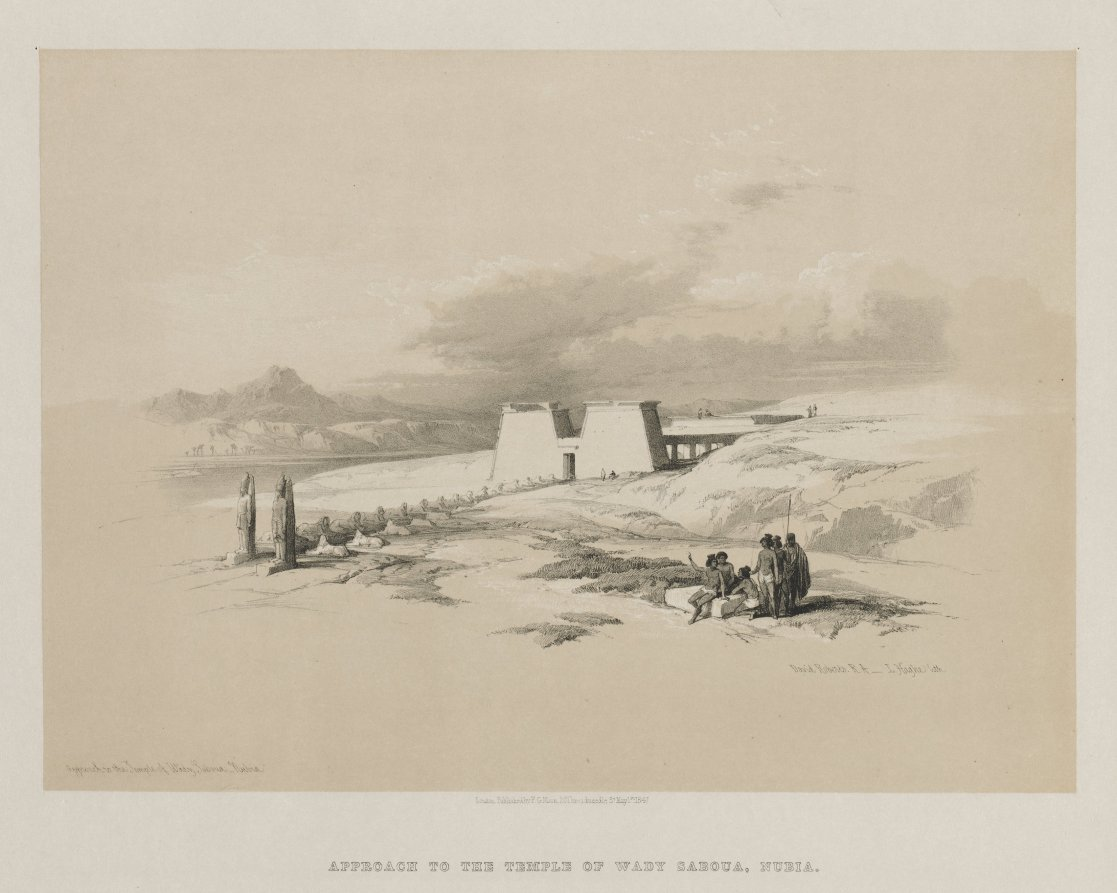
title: Egypt and Nubia, Volume I: Approach to the Temple of Wady Saboua, Nubia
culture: England, 19th century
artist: Louis Haghe (British, 1806–1885)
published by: F. G. Moon, 20 Threadneedle Street, London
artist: after David Roberts (Scottish, 1796–1864)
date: 1847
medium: color lithograph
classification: Print